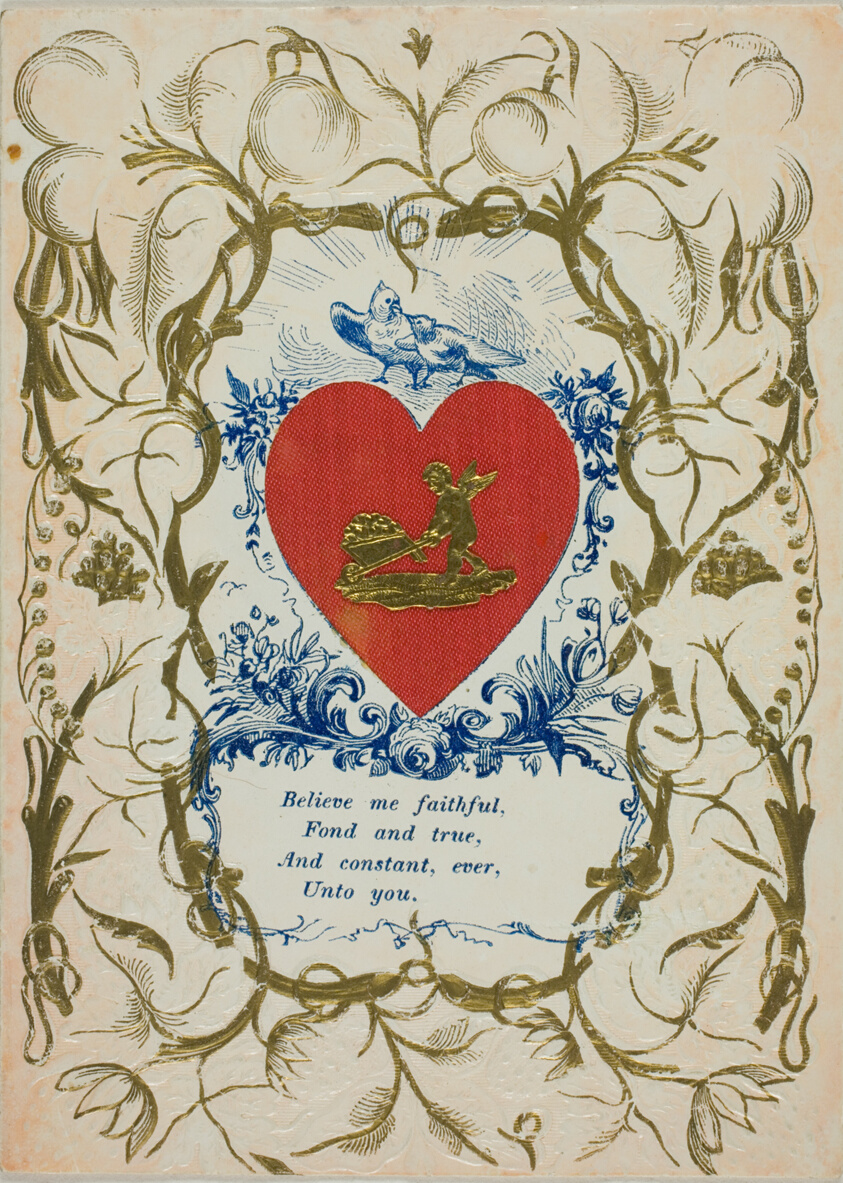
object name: Print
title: Believe Me Faithful (valentine)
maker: Unknown Artist; English, 19th century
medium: Collaged elements and gold ink on lithograph in blue ink on embossed ivory wove paper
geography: England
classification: valentine; prints and drawing; print